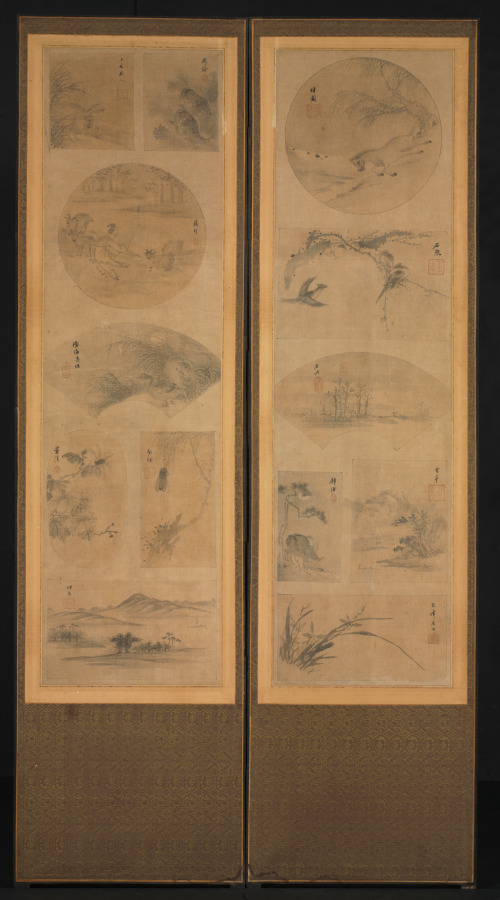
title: Painting of One Hundred Themes (obverse)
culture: Korea, Joseon dynasty (1392–1910)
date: late 1800s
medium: Ten-panel folding screen affixed with album leaves (obverse), calligraphy (reverse), ink and color on silk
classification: Painting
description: This screen depicts paintings on one side and poems on the other—an economical format often used in Korea to allow the viewer to enjoy both sides of one screen. The front features an assortment of bird-and-flower, landscape, and figural paintings executed according to the brush manner of more than 50 artists. A calligrapher has brushed several Chinese poems about the four seasons on the reverse side, among them "Composing in the Daytime of Summer" by Tang poet Liu Zongyuan (773–819) and "Composing when Spring Begins" by Song scholar Zhang Shi (1133–1180).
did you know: Depicting small images of various subjects became one of the most popular types of painting toward the end of the 19th century.